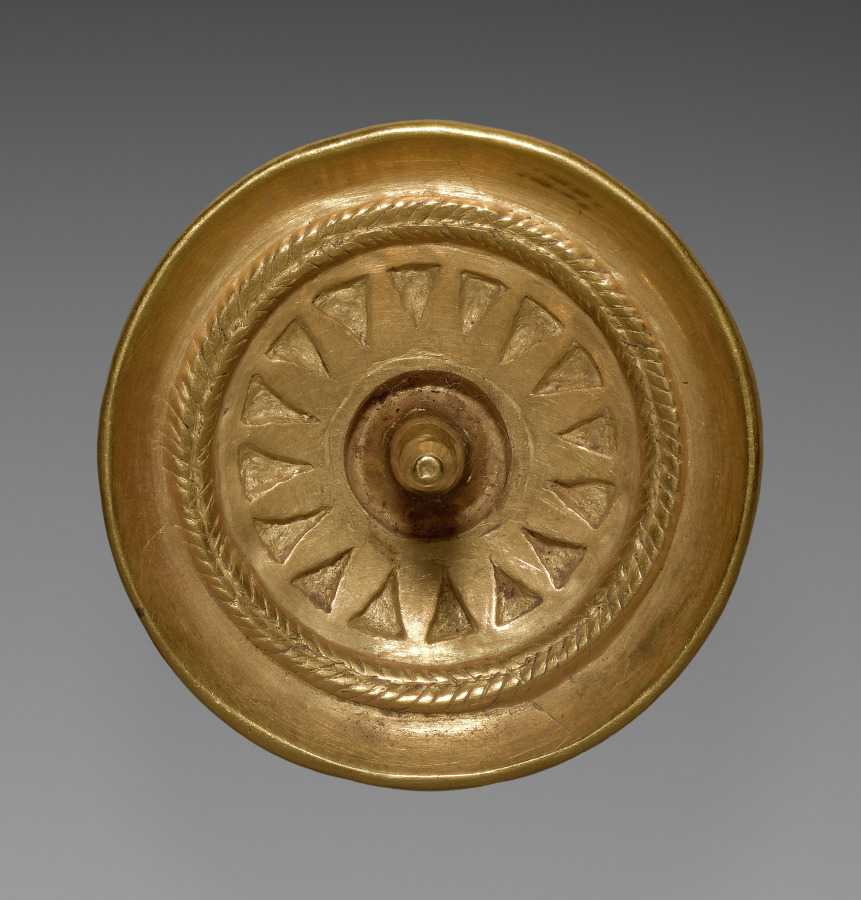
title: Ear Spool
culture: Panama, Conte style, 5th - 10th century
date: c. 400–900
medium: hammered gold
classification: Metalwork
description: Harvard archaeologists excavated this and seven other ornaments from several burials at Sitio Conte, a cemetery famous for its lavish graves of powerful chieftains. The young man buried in Grave 26 was such a chief. His status was stunningly memorialized by 21 human companions and 475 objects, many of them personal ornaments made of gold, including a large chest plaque and a rod-shaped ear ornament.